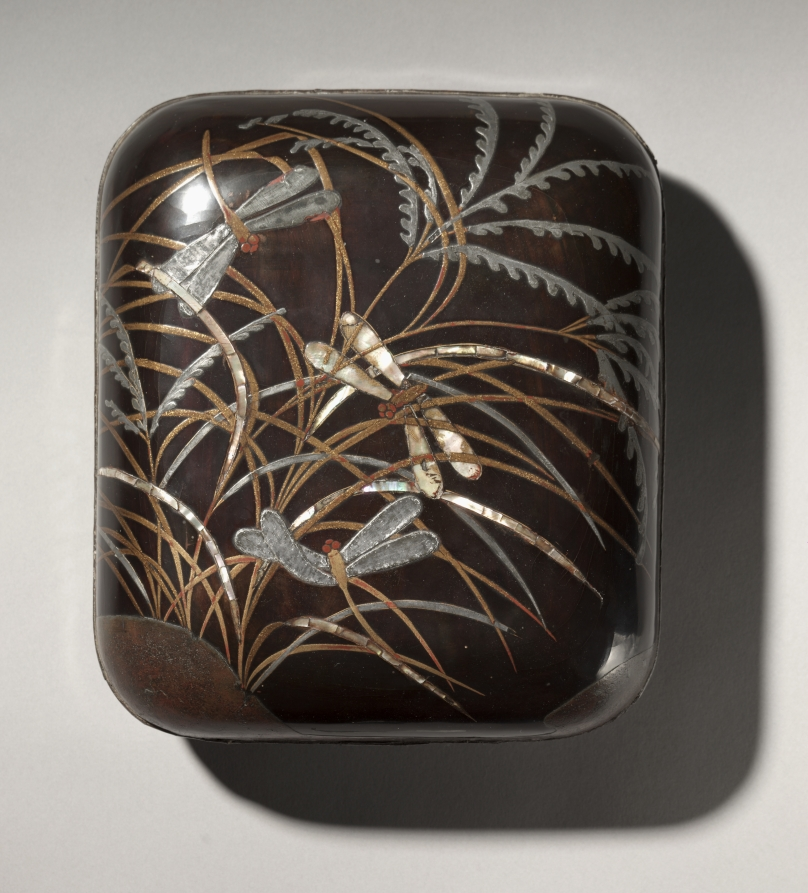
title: Letter Box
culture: Japan, Edo period (1615–1868)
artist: manner of Ogata Kōrin (Japanese, 1658–1716)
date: 1700s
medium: lacquer with pewter and mother-of-pearl inlay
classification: Lacquer